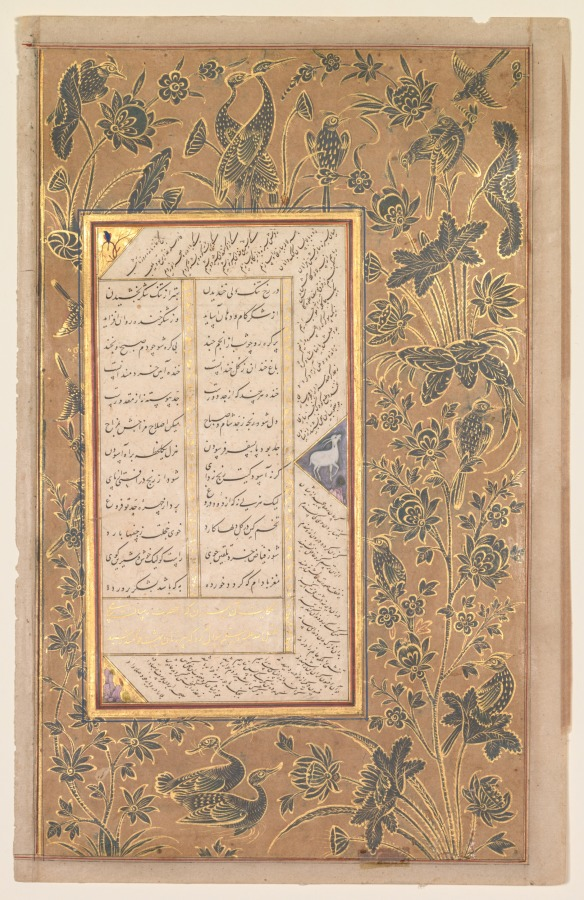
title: Page from a Panj Ganj (Five Treasures) of Abd al-Rahman Jami (Persian, 1414–1492), with two Persian masnavis: Yusuf va Zulaykha (Joseph and Zulaykha) and Subhat al-abrar (Rosary of the Righteous) (verso)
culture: Northern India, Mughal, early 17th century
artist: Mushfiq (Indian, active early 1600s)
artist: and others (Indian)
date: 1520–1607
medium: Gum tempera, ink, and gold on paper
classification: Painting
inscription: The miniature signed at upper left: ' amal - i Mushfiq sana 1015 (the work of the Mushfiq year 1015) Text on verso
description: This page is from a prized manuscript owned by one of the most respected statesmen of the imperial Mughal court, Abd al-Rahim. He served as the Khan Khanan, or vizier, the trusted minister under both Akbar and Jahangir. Abd al-Rahim was an avid book collector and patron of the arts. He acquired this book of five extended narrative poems, which included the story told in rhyme of the romance between Joseph and the Egyptian lady Zulaykha, about 80 years after its completion. The book’s illumination had not been finished, so Abd al-Rahim commissioned the exuberant decor of the borders and insets along with fullpage paintings that illustrate key scenes in the text.